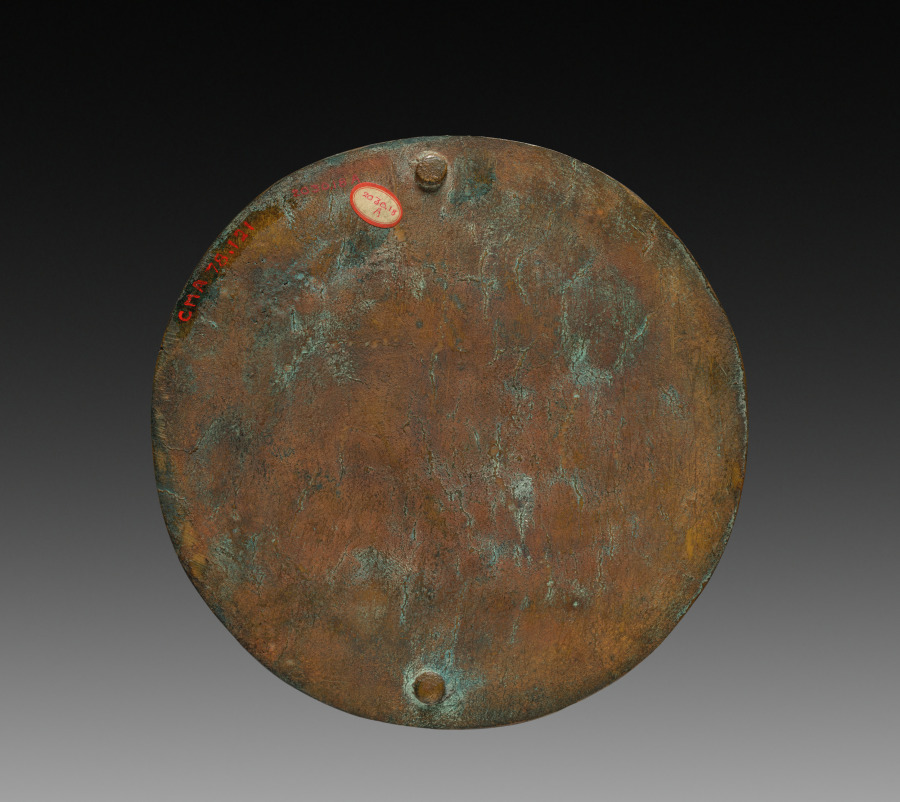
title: Medal: Loïe Fuller (reverse)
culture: France, 20th century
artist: Pierre Roche (French, 1855–1922)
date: 1900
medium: bronze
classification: Metalwork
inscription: "1900/Un etre/qui/n'etait/que/lumière or et gaze" (Baudelaire ?). Signed beneath: R in an irregularly shaped circle.